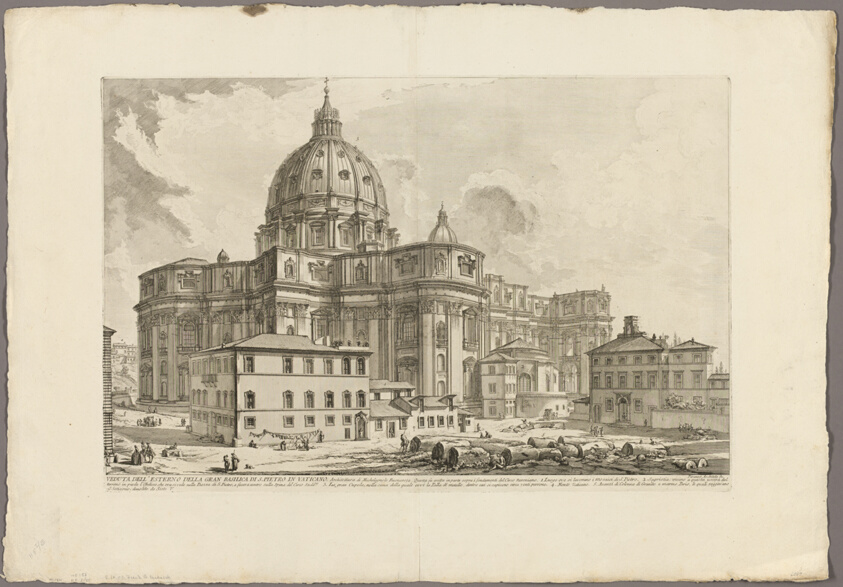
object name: Print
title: View of the exterior of St. Peter's Basilica in the Vatican, from Views of Rome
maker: Giovanni Battista Piranesi (Italian, 1720-1778)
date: 1750/59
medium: Etching on heavy ivory laid paper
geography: Italy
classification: etching; print; prints and drawing